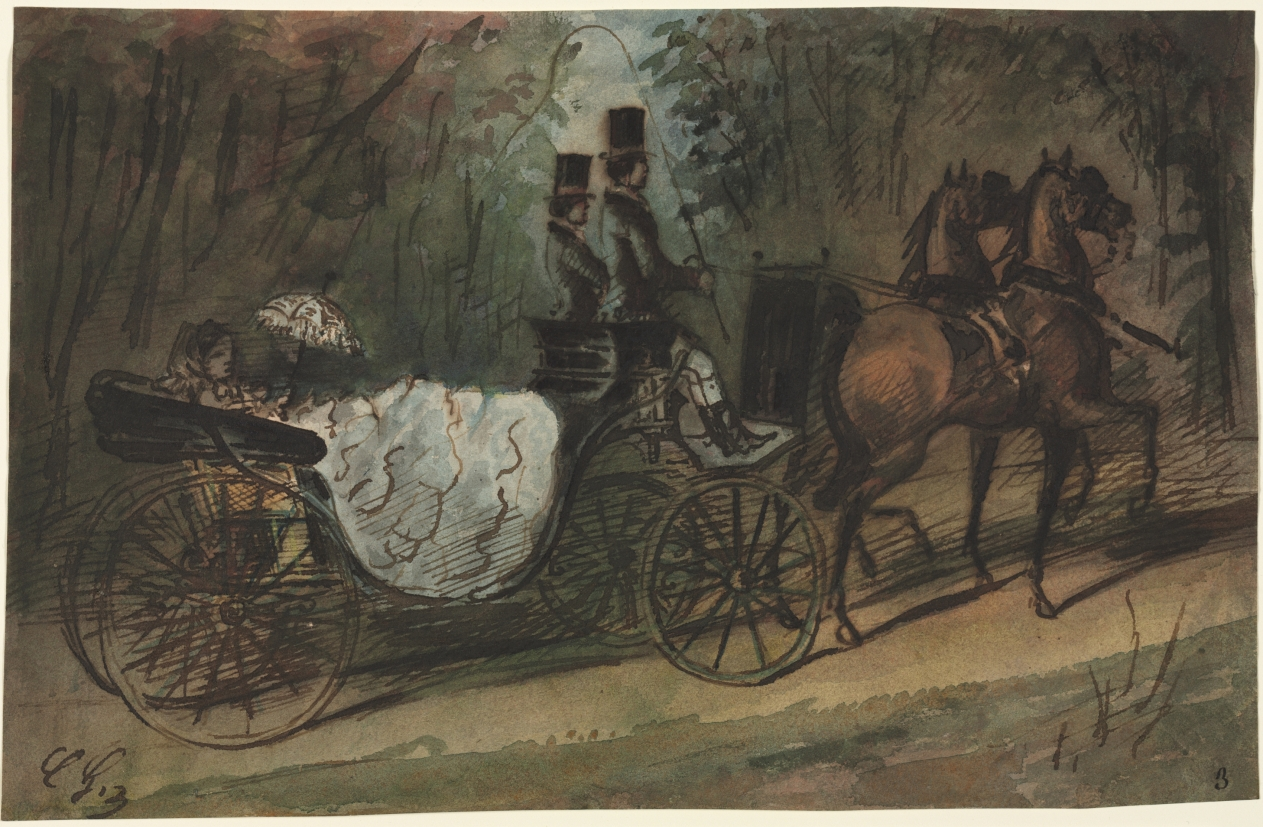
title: Carriage in the Bois de Boulogne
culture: France, 19th century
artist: Constantin Guys (French, 1805–1892)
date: 1800s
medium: pen and brown ink, brush and brown wash, and watercolor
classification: Drawing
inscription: signed, lower left, in brown ink: C Guys ; lower right, in black ink: 3